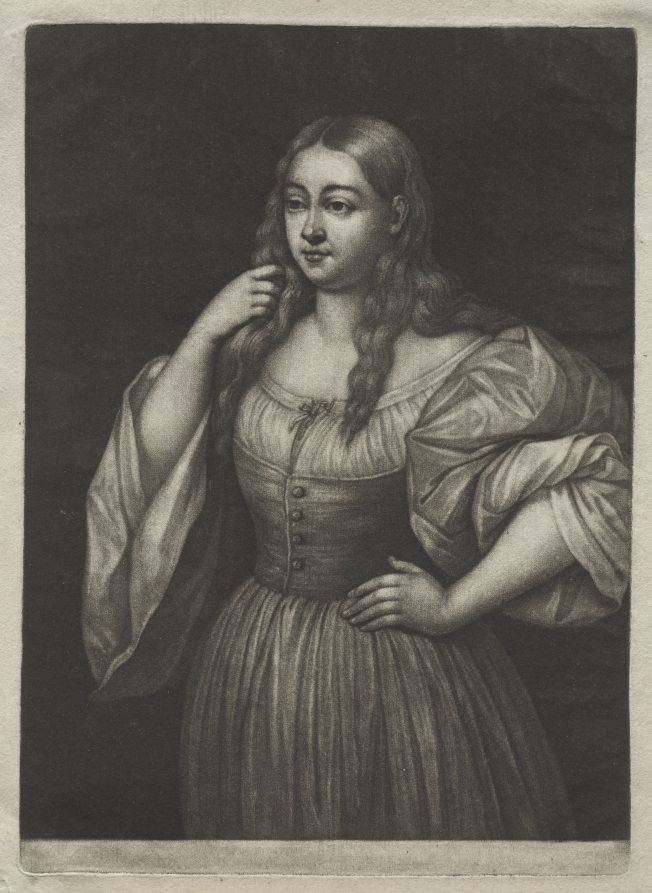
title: Italian Girl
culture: Netherlands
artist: Wallerant Vaillant (Dutch, 1623–1677)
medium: mezzotint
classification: Print